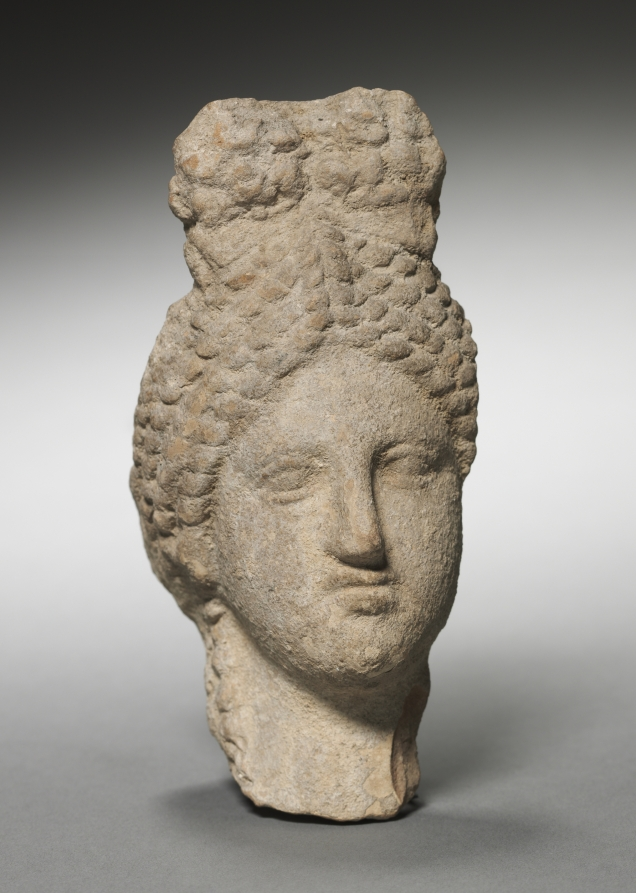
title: Woman's Head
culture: Greece, Sicily(?)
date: 300s BCE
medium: terracotta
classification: Sculpture